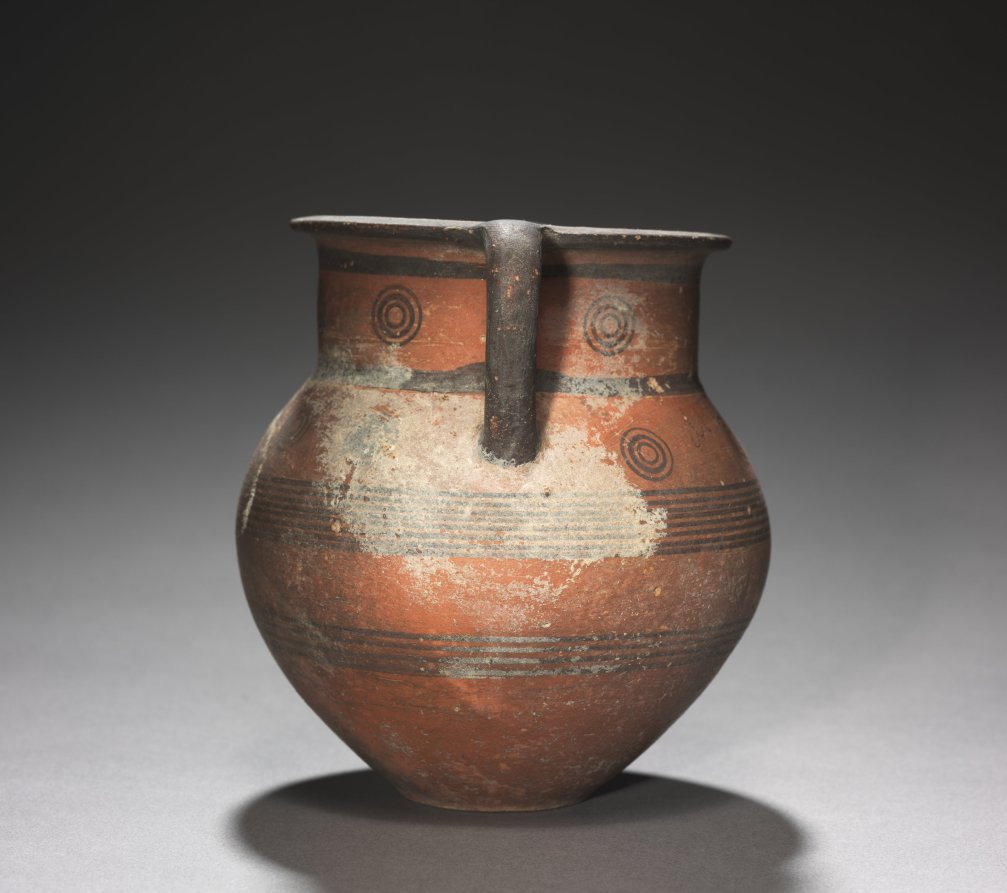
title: Amphora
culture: Cyprus, Cypro-Archaic I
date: c. 750–600 BCE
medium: red ware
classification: Ceramic